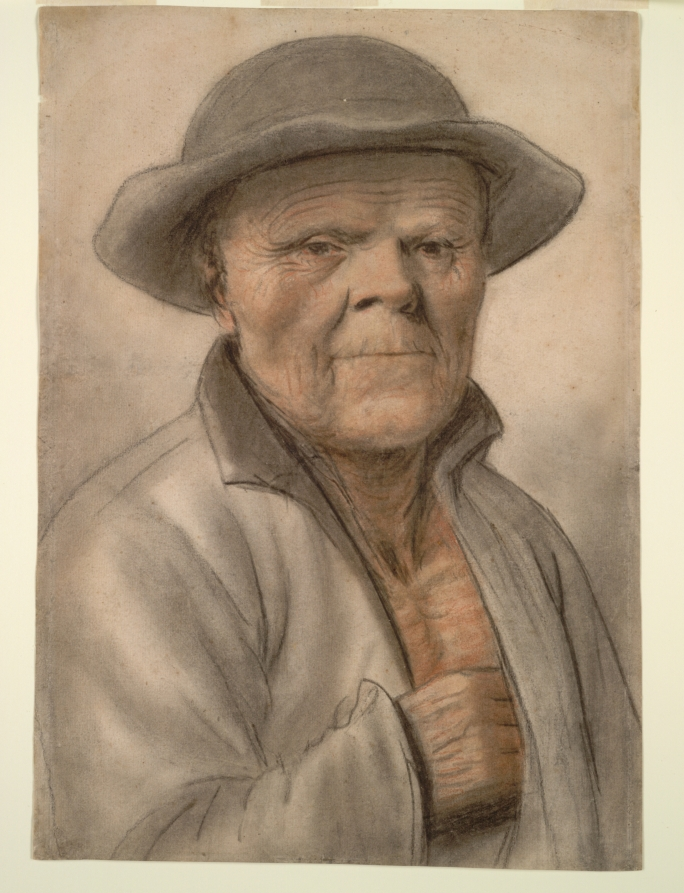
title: Portrait of an Old Man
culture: France, 17th century (?)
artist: manner of Nicolas Lagneau (French, 1590–1666)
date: 1600s?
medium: Black, red and brown chalk, with stumping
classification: Drawing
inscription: verso, upper right, in graphite: 23 18 1/4 00 ; lower center, in graphite: (16)